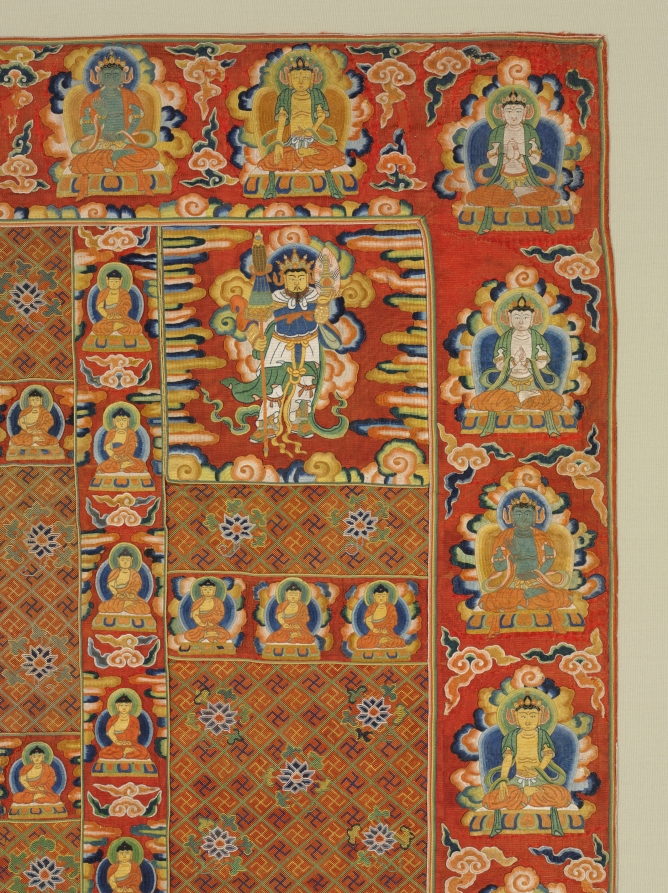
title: Buddhist Priest's Ceremonial Robe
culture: China, Ming dynasty (1368–1644)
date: 1400s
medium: silk and gold thread; embroidery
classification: Garment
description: This example of imperial embroidery is one of the earliest surviving Chinese Buddhist robes (kasaya) in the West. Depicting 991 Buddhas, each slightly different, it is constructed out of patches in reference to the legend in which the Buddha's favorite disciple divided a robe he was given into 30 pieces. Patchwork is also a sign of humility. Multiple Buddha images known as “thousand Buddha” designs are seen painted and sculpted on the walls of cave temples in India, Afghanistan, Central Asia, and China, but are rare on garments. The Four Heavenly Kings, guardians of the four directions, occupy the textile’s corners. When draped around the body, the inverted figures in the upper left corner appear right side up. Robes with 25 columns were worn by the highest-ranking clergy on ceremonial occasions.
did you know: The Five Transcendent Buddhas, who symbolize the purity of the five elements, are repeated around the edges.